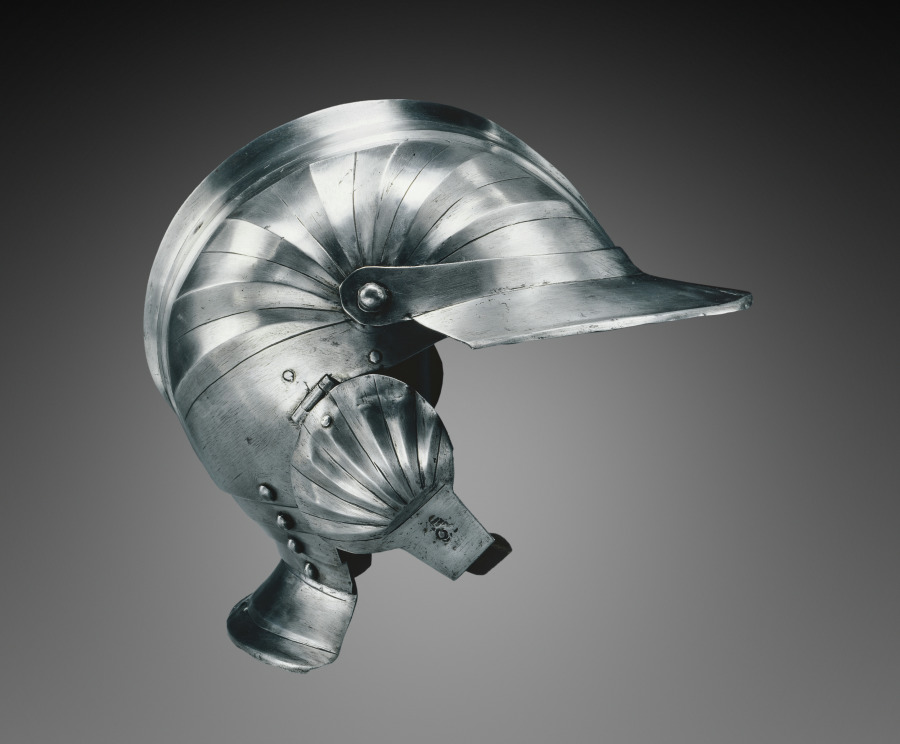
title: Burgonet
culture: Italy, Milan(?), 16th century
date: c. 1510–40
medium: steel, radiate flutings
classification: Arms and Armor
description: A burgonet is a light, open helmet characterized by a peak, a fall over the eyes, and hinged earpieces. Used by cavalry in the 1500s and 1600s, they were sometimes worn with a buffe, a separate detachable element that protected the face and throat not covered by the burgonet.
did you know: The burgonet helmet is the successor to the previously worn sallet which was much the same but without the hinged earpieces and extended peak over the eyes.